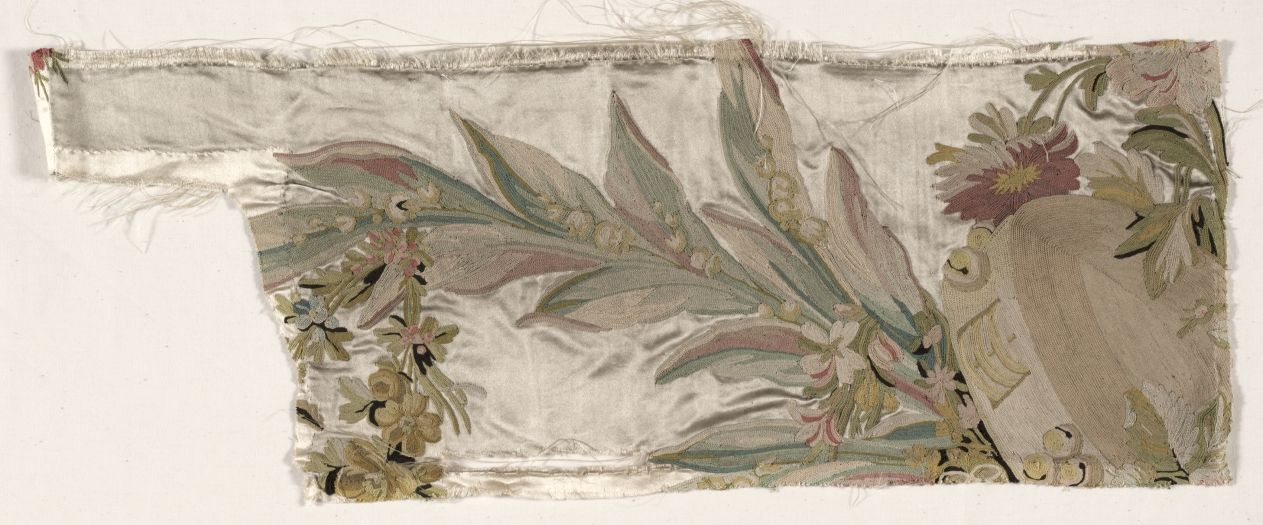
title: Coverlet Fragment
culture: France, 18th Century, period of Louis XVI (1774-1793)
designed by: Philippe de Lasalle (French, 1723–1805)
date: c. 1760–1770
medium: embroidered satin and silk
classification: Textile